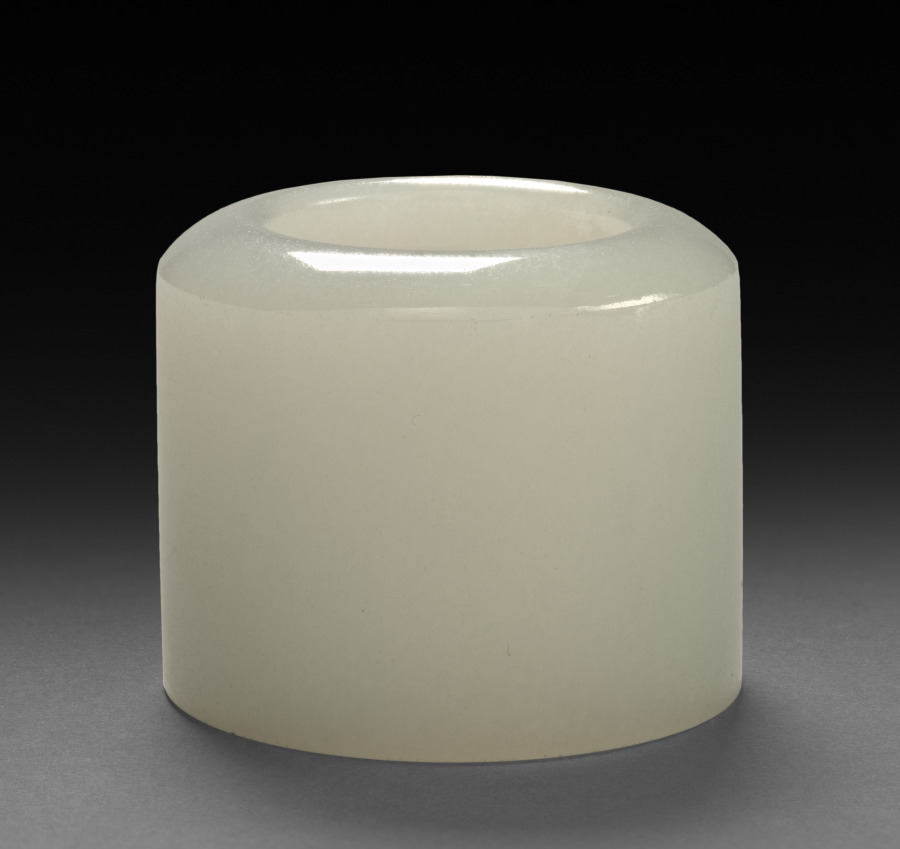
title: Thumb Ring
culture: China, Qing dynasty (1644-1911) or Republican period (1912-49)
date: 1800s–1900s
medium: white jade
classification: Jewelry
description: Jade rings were worn by men on the thumb of the right hand to assist with holding and pulling the string of the archer’s bow. However, thumb rings were also fashionable accessories for civil officials in the late Qing dynasty.